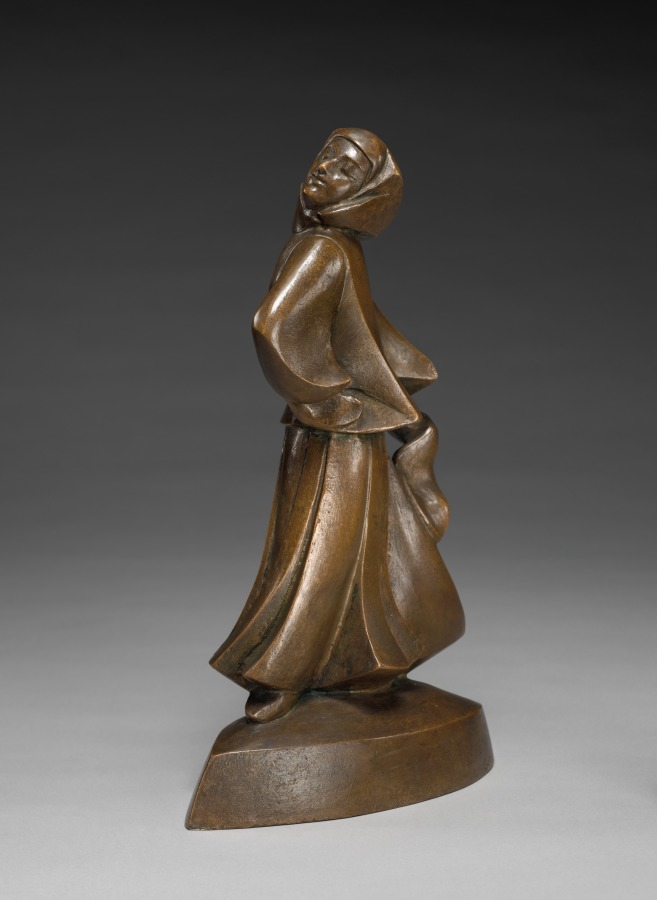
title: Russian Dancer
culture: America, Ohio, Cleveland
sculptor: Alexander Blazys (American, born Russian Empire [now Lithuania], 1894–1963)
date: 1925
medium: bronze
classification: Sculpture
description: A Lithuanian immigrant, Blazys introduced modernist sculpture to Cleveland upon his arrival in 1925. These figures merge rhythmic movement inspired by music with faceted, geometric planes derived from Cubism.